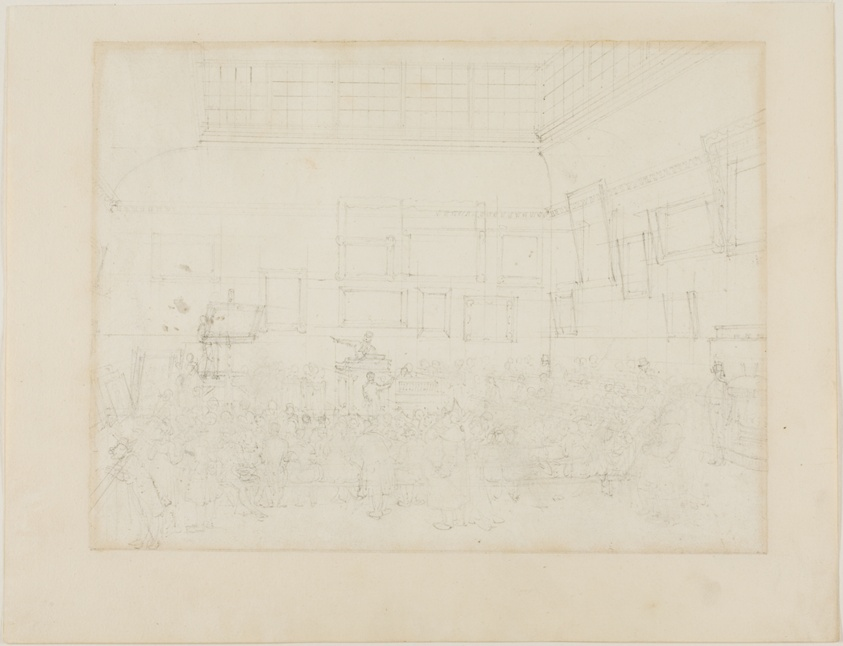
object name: Drawing and Watercolor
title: Study for Christie's Auction Room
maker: Augustus Charles Pugin (English, born France, 1762-1832); Thomas Rowlandson (English, 1756-1827)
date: c. 1808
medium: Graphite on ivory wove paper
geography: England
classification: graphite; drawings (visual works); prints and drawing